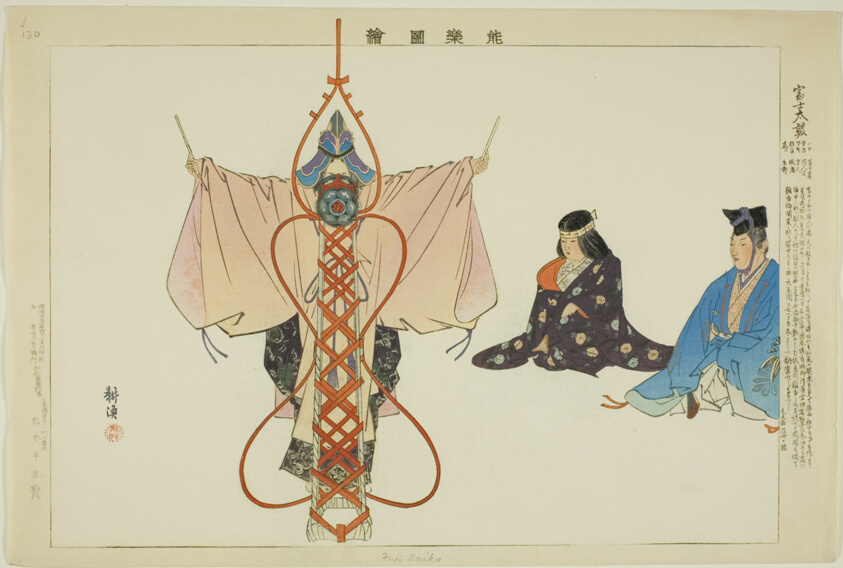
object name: Print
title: Fuji Taiko, from the series "Pictures of No Performances (Nogaku Zue)"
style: Japanese (culture or style)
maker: Tsukioka Kogyo; Japanese, 1869-1927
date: 1898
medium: Color woodblock print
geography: Japan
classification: woodblock print; print; asian art